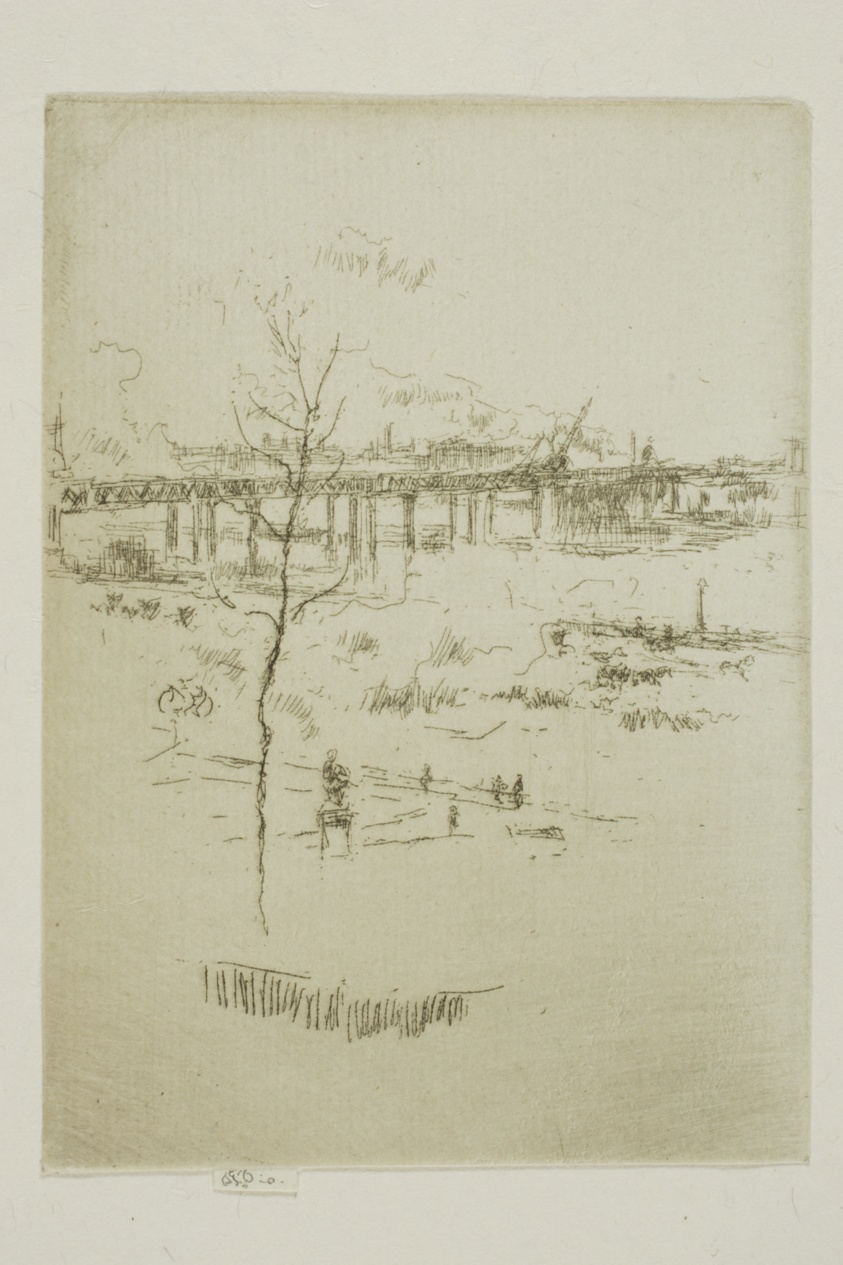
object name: Print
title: Charing Cross Bridge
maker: James McNeill Whistler (American, 1834-1903)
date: 1887/88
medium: Etching with foul biting in dark brown ink on ivory paper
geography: United States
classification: etching; foul biting; print; prints and drawing; paper